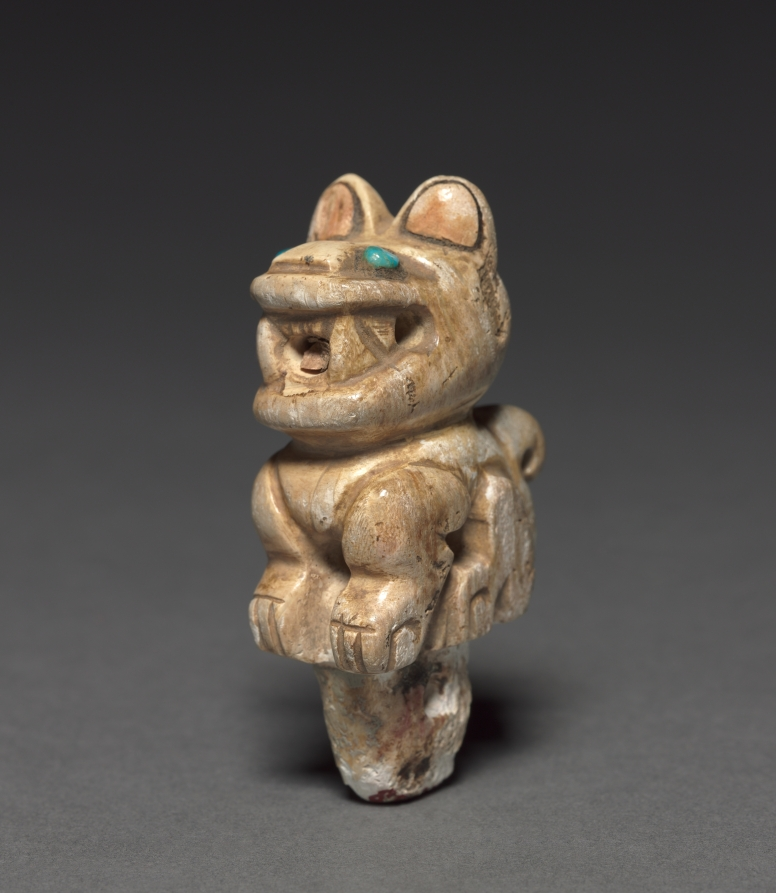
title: Crouching Feline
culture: Peru, Wari (?), 6th-10th Century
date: c. 500–900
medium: stone, turquoise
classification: Jewelry